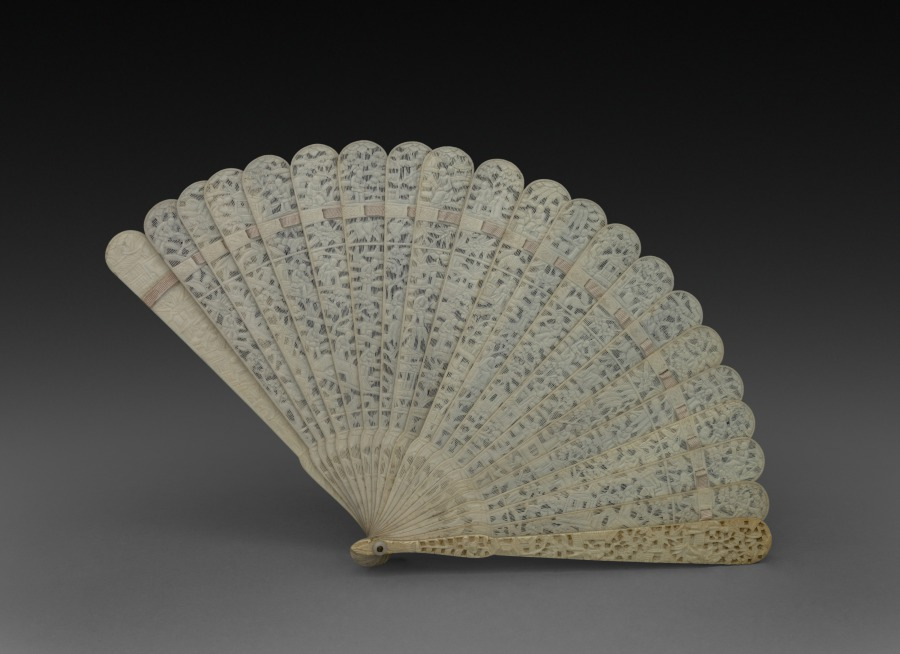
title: Fan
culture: China, Qing dynasty (1644-1911)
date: 1644–1911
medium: ivory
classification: Ivory